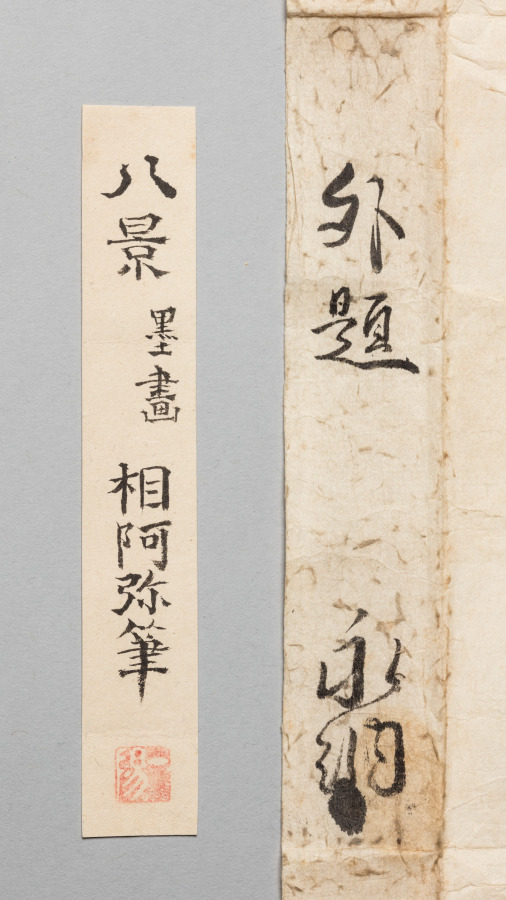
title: Landscape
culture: Japan, Edo period (1615–1868)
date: early 1600s to mid-1800s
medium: hanging scroll; ink on paper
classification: Painting